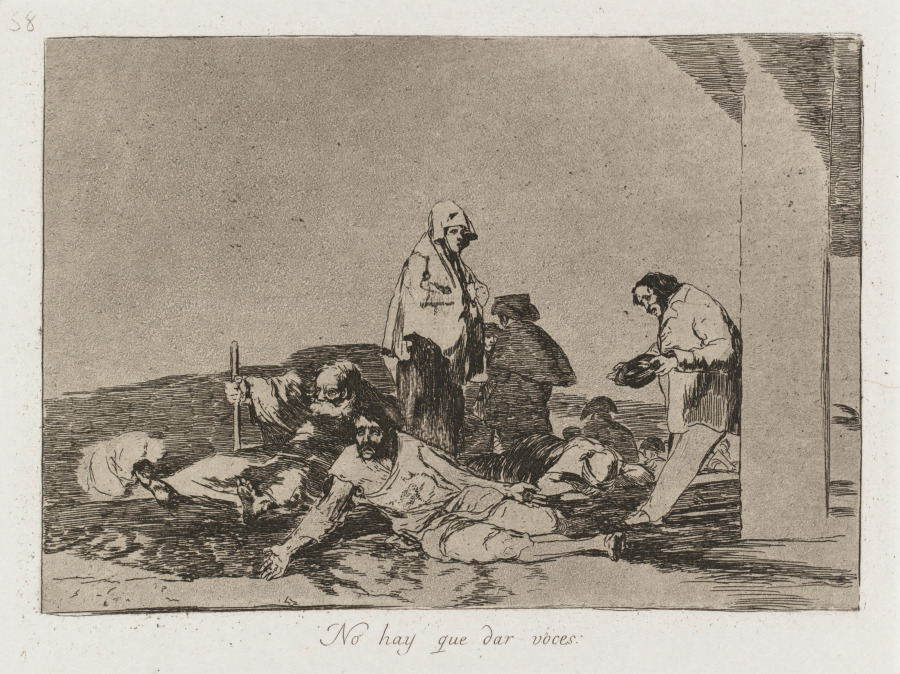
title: Disasters of War: Pl. 58, It is no use shouting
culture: Spain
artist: Francisco de Goya (Spanish, 1746–1828)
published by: Real Academia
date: 1810–1813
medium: Etching and aquatint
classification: Print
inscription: Bottom right, in graphite: 01669G00002; verso: lower right corner, upside down: G-43; In plate, below image, center: No hay que dar voces; in plate, above image, upper left: 58